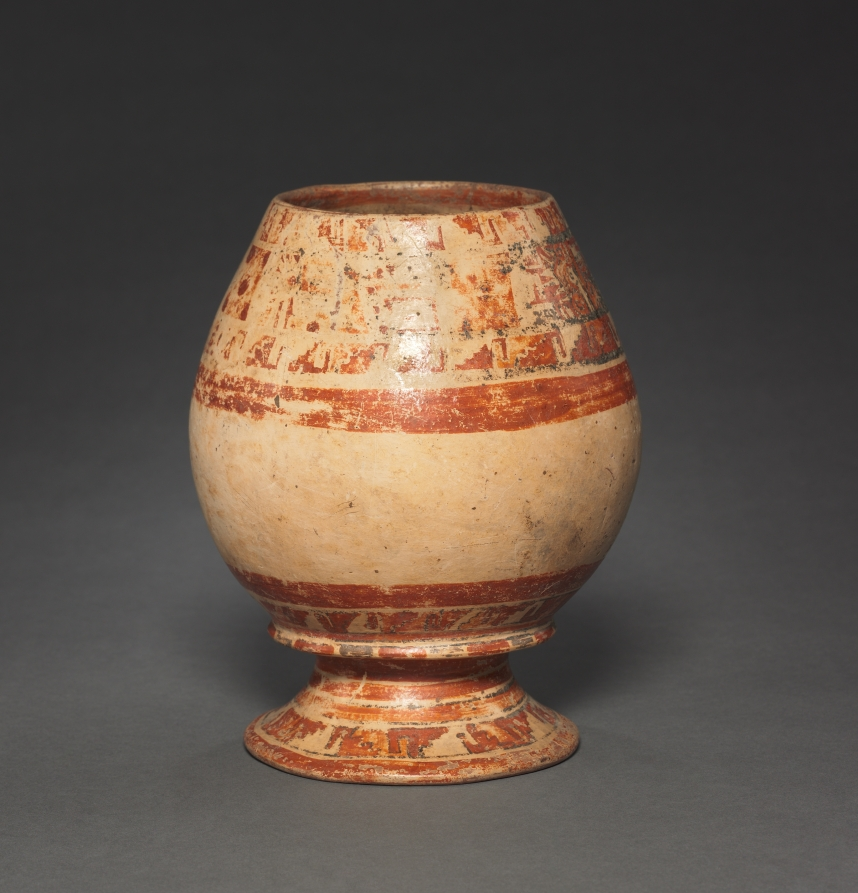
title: Vase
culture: Costa Rica, Filadelphia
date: 1000–1550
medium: earthenware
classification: Ceramic